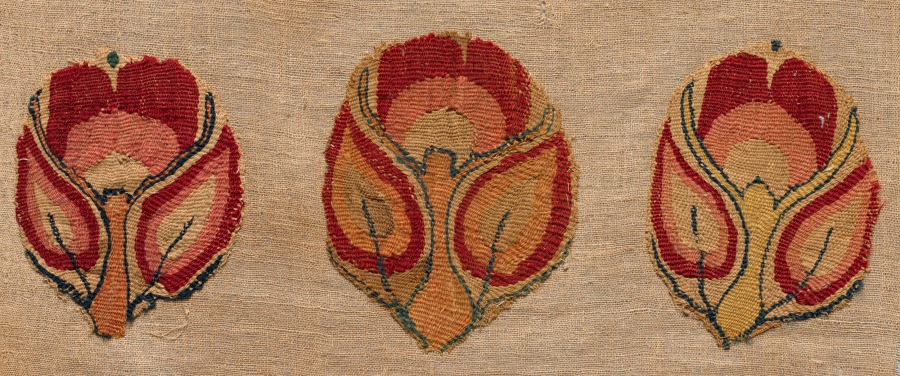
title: Fragments from a Curtain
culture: Egypt, Byzantine period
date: 300s–500s CE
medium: tapestry (originally inwoven in tabby ground, applied to plain tabby linen); linen and wool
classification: Textile